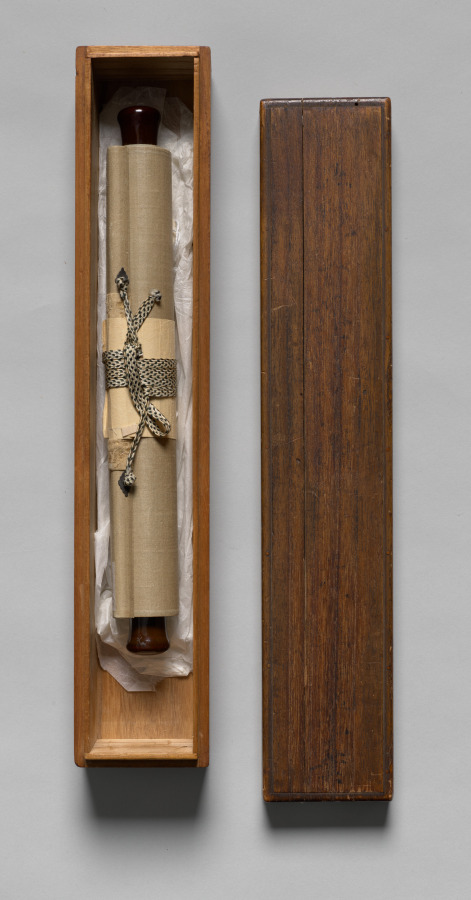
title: Bodhidharma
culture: Japan, Muromachi period (1392–1573)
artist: Unkei Eii (Japanese, active 1504–1520)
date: early 1500s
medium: hanging scroll; ink on paper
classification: Painting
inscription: signed: "Unkei" two-line inscription signed: Shunpō Sōki (1416-1496), 40th abbot of Daitokuji temple